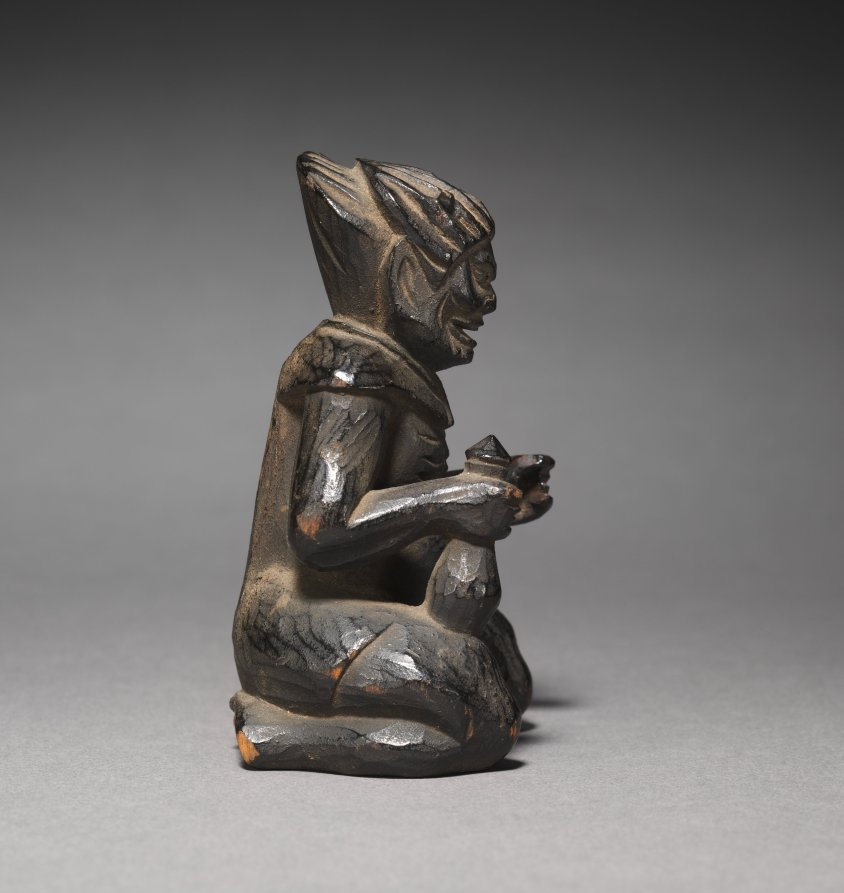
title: En no Gyōja with Zenki and Kōki (Kōki)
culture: Japan, Edo period (1615–1868)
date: 1615–1868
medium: wood and paint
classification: Sculpture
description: This is one of a trio of figures identified as Enno Gyoja and his two attendants, Zenki and Koki. The set follows the iconography of Shugendo, the traditional mountain ascetic practice in Japan. Enno Gyoja is depicted as a hermit-monk, seated on a rock attached to a modern base. He holds a staff in his right hand and a sutra in the left. The two attendants take the form of half-human, half-demonic figures and are regarded as a married couple.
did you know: Koki carries a sake bottle.